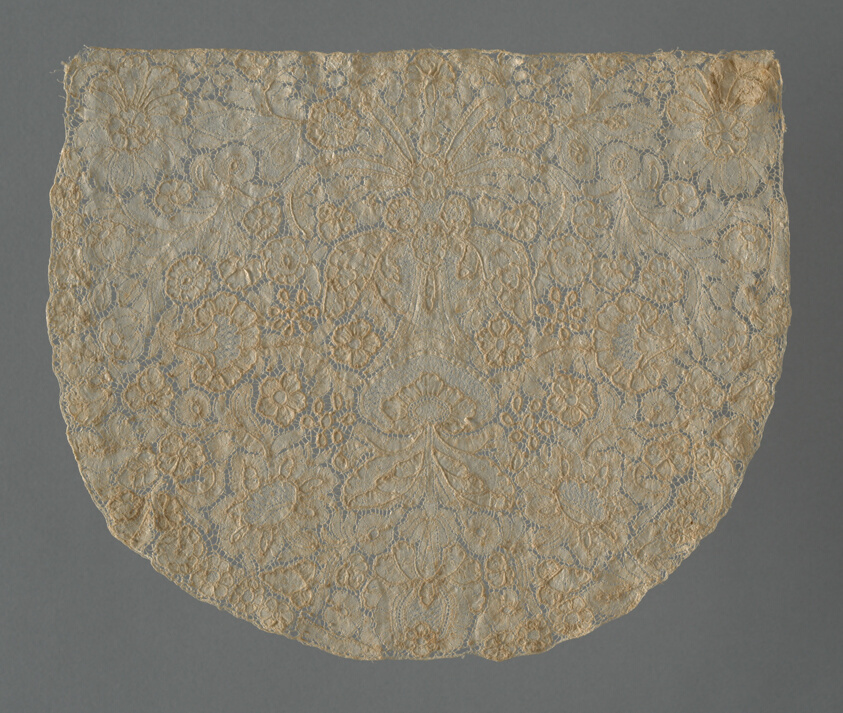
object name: Costume and Accessories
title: Cap Crown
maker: Flanders, Brussels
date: 1725/45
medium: Linen, bobbin part lace of a type known as "Brussels" with a twisted bar ground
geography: Brussels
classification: costume accessory; lace - bobbin; textile; costume; costume accessory - headdress; costume accessory worn above the waist